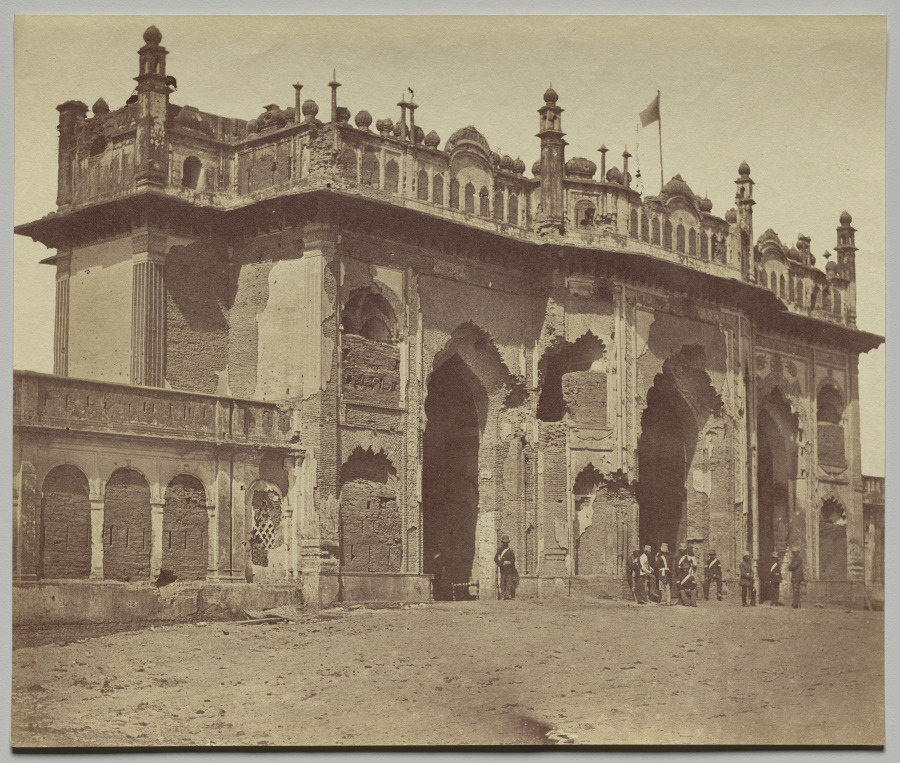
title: Gateway of the Small Emambara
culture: England, 19th century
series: Lucknow After the Siege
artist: Felice A. Beato (British, 1832–1909)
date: 1858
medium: albumen print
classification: Photograph